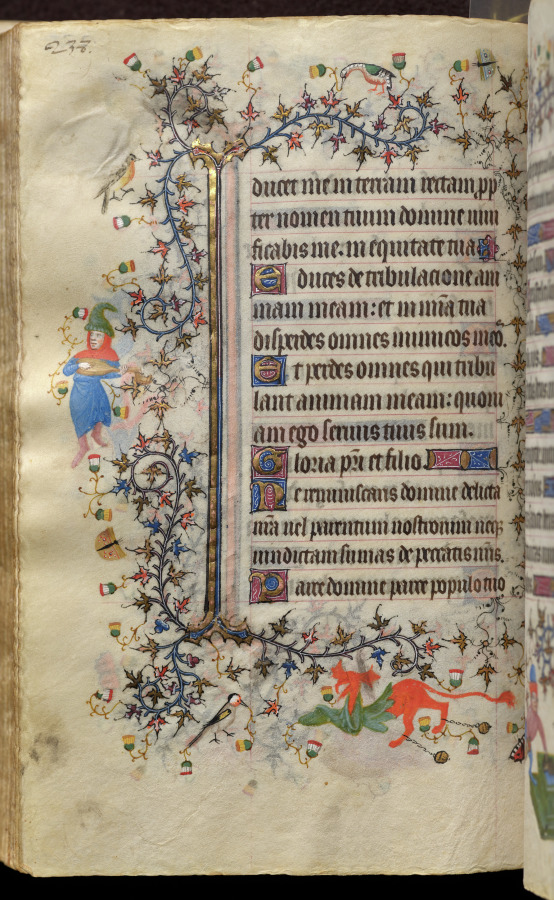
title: Hours of Charles the Noble, King of Navarre (1361-1425): fol. 119v, Text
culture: France, Paris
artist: Master of the Brussels Initials and Associates (French)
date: c. 1405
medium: ink, tempera, and gold on vellum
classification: Bound Volume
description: This precious volume was obviously highly prized by its owner, the French-born King of Navarre, who had his coat of arms painted on no less than twenty folios. Rather than directly commissioning this manuscript from a specific workshop, it seems that Charles the Noble acquired his book of hours -- perhaps ready-made for the luxury market -- while on a trip to Paris in 1404-05. A collaborative effort, six painting styles are evidenced within the pages of this codex, those of two Italians, two Frenchmen, and two Netherlanders. The painter who was responsible for the planning and decoration of the book, and who produced seventeen of the large miniatures, was a Bolognese artist known as the Master of the Brussels Initials. His principal assistant, responsible for most of the borders, was a Florentine who signed his name "Zecho" da Firenze on folio 208 verso.